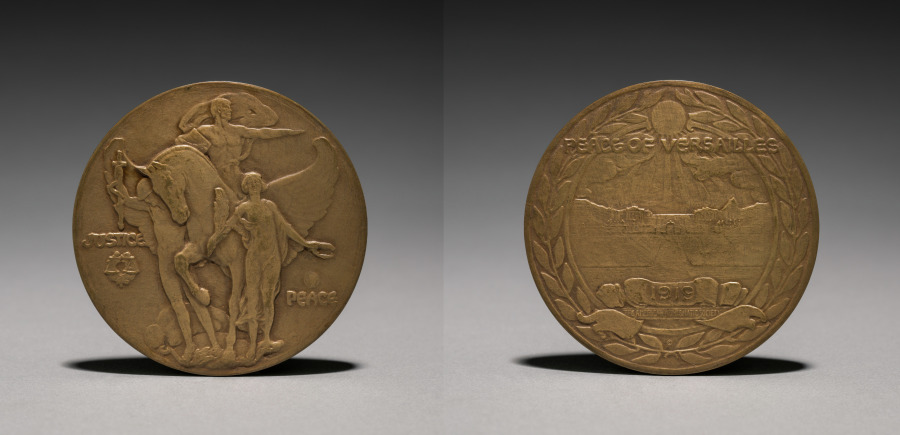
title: Medal to Commemorate the Treaty of Versailles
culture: America, early 20th century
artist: Chester Beach (American, 1881–1956)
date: 1919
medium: bronze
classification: Metalwork